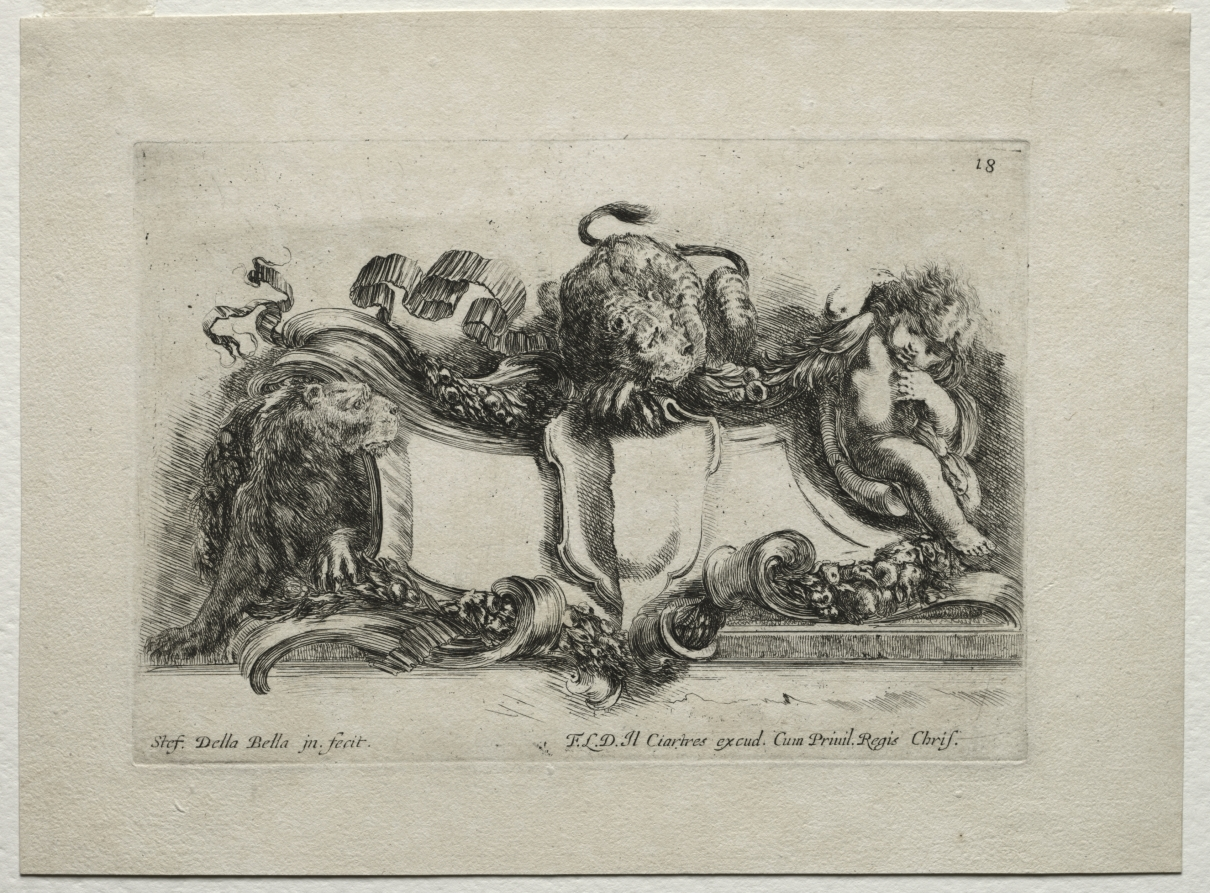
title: Collection of Various Caprices and New Designs of Cartouches and Ornaments: No 18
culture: Italy, 17th century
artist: Stefano Della Bella (Italian, 1610–1664)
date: 1646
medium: etching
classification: Print